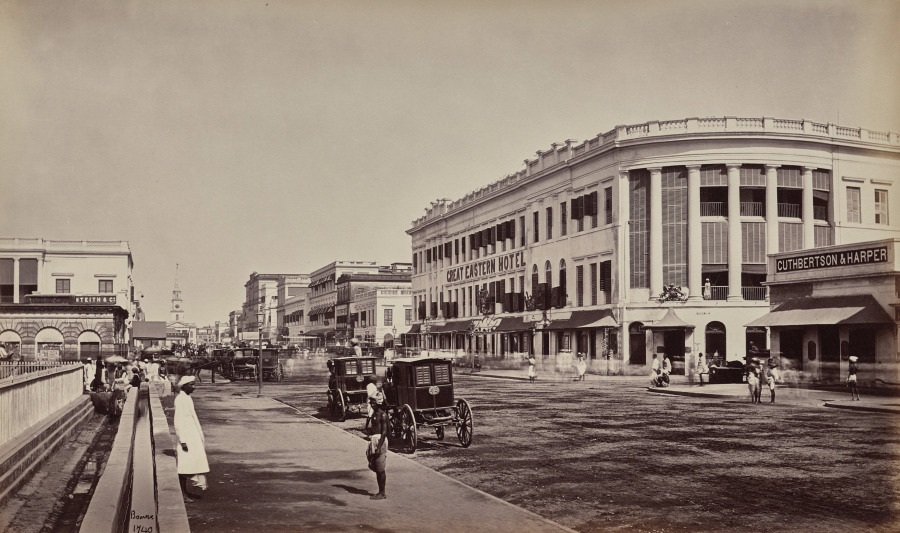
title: Calcutta. Old Court House Street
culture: England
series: Photographs of Northern India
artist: Samuel Bourne (British, 1834–1912)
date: 1863–70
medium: albumen print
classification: Photograph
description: The 50 images in this album, all taken in the 1860s, move from the hill towns of the Himalayas down to cities including Lahore (now in Pakistan), Delhi, Lucknow, Agra, Benares (now Varansi), and Calcutta (now Kolkata). Architectural studies of major monuments offer valuable historical records of what sites such as the Taj Mahal and the imperial mosque of the Mughal emperors in Delhi looked like before 20th-century restorations.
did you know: Samuel Bourne, the author of most the images in this album, was a banker in England before he moved to India to become a professional photographer.